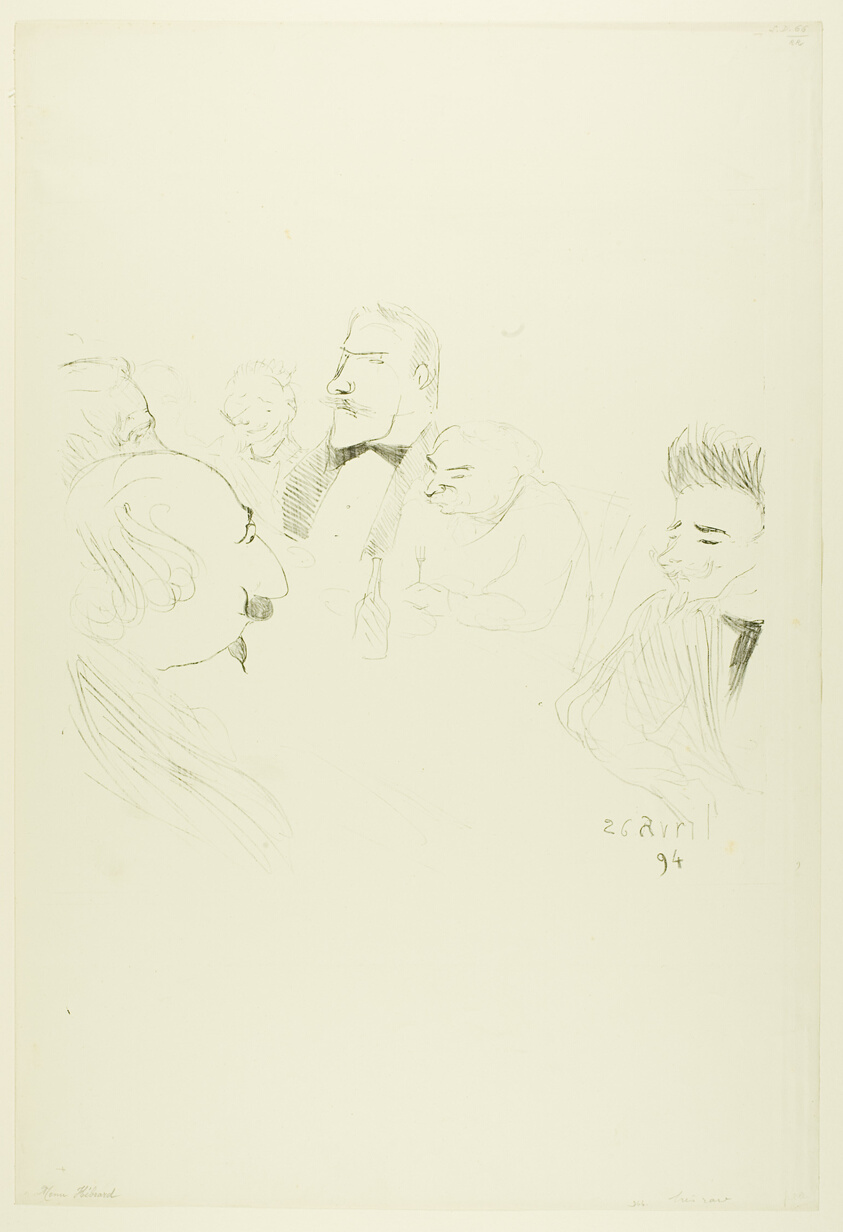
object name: Print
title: Menu Card for Adrien Hébrard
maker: Henri de Toulouse-Lautrec (French, 1864-1901)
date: 1894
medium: Lithograph on cream wove paper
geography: France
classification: lithograph; print; prints and drawing